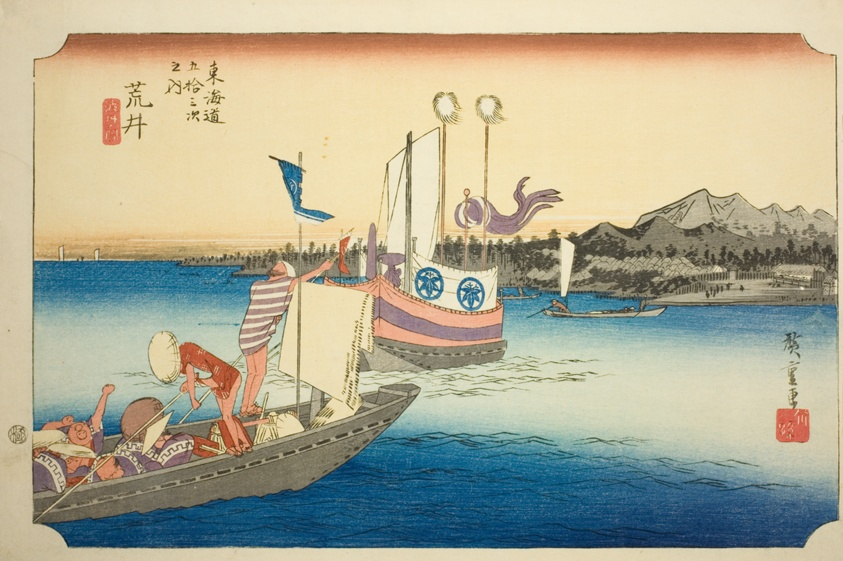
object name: Print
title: Arai: View of Ferryboats (Arai, watashibune no zu), from the series "Fifty-three Stations of the Tokaido (Tokaido gojusan tsugi no uchi)," also known as the Hoeido Tokaido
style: Japanese (culture or style)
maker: Utagawa Hiroshige 歌川 広重; Japanese, 1797-1858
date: c. 1833/34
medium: Color woodblock print; oban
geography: Japan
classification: woodblock print; print; asian art